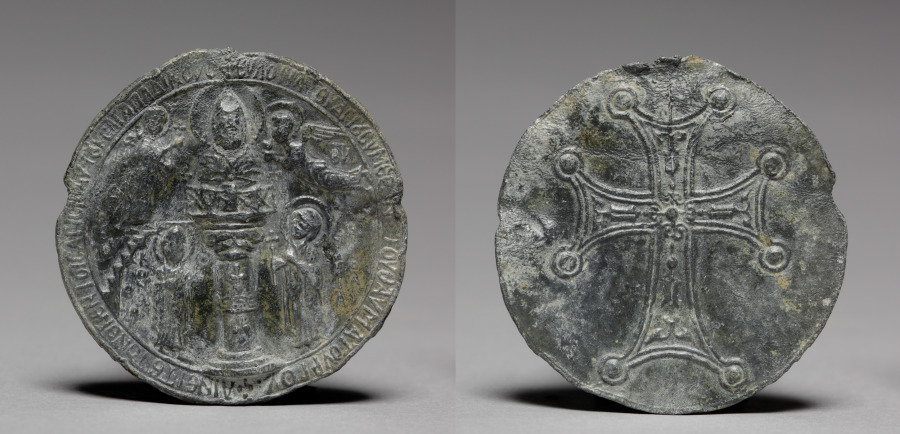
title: Pilgrim's Medallion with Saint Symeon the Younger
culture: Byzantium, Syria, Byzantine period, early 12th Century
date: c. 1100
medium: lead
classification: Metalwork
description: Saint Symeon the Younger was a stylite saint, an early Christian ascetic who fled the world for the desert and, perched on a column, spent his days fasting and praying. The site of Symeon’s column attracted many pilgrims during and after his lifetime. Medallions like this one, showing Symeon atop his column, were taken home by pilgrims in commemoration of their visit and were believed to serve their owners as protective talismans.